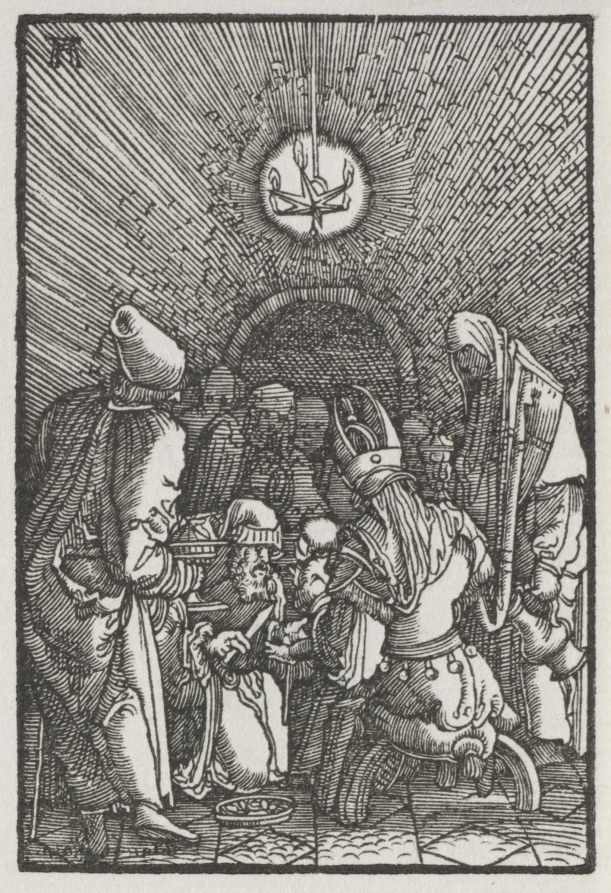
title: The Fall and Redemption of Man: The Circumcision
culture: Germany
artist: Albrecht Altdorfer (German, c. 1480–1538)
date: c. 1515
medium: woodcut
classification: Print